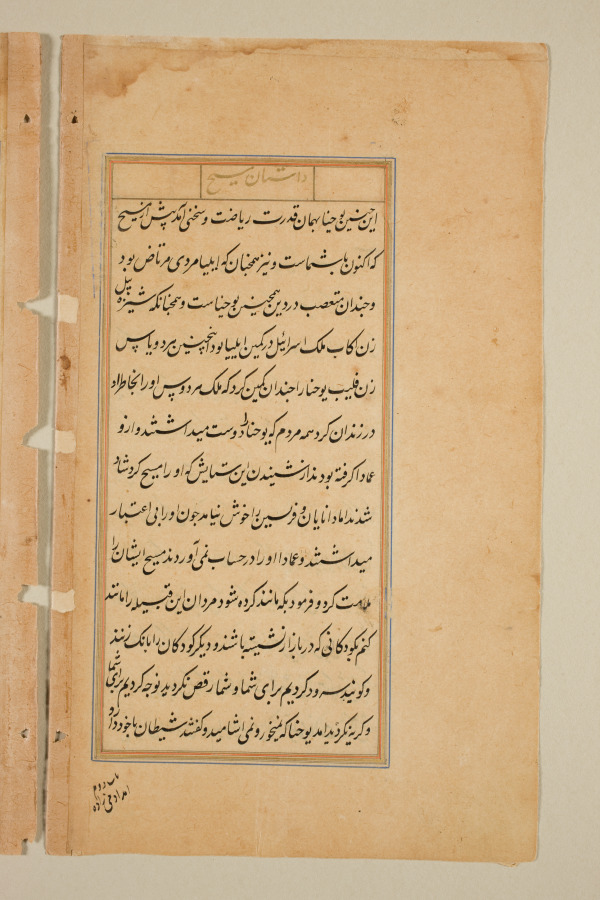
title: Text page from a Mirror of Holiness (Mir’at al-quds) of Father Jerome Xavier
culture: Mughal India, Allahabad, made for Prince Salim (1569–1627)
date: 1602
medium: Ink and gold on paper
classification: Manuscript